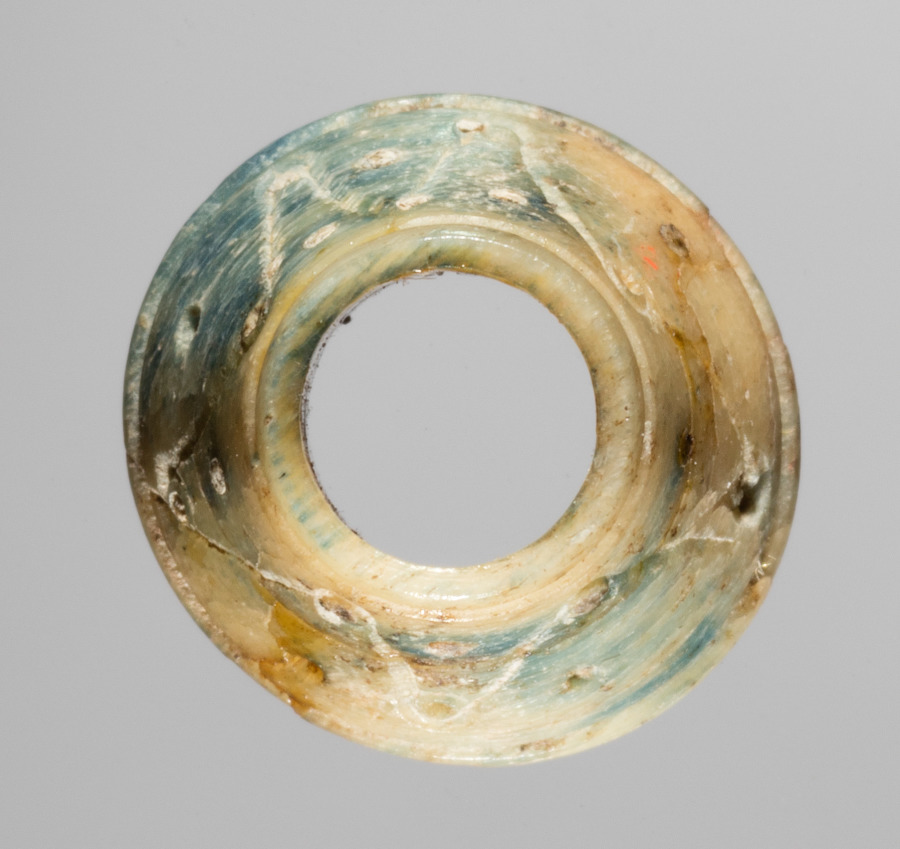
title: Spindle Whorl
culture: Iran, early Islamic period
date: 700s - 900s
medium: bone, incised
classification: Spindle Whorl